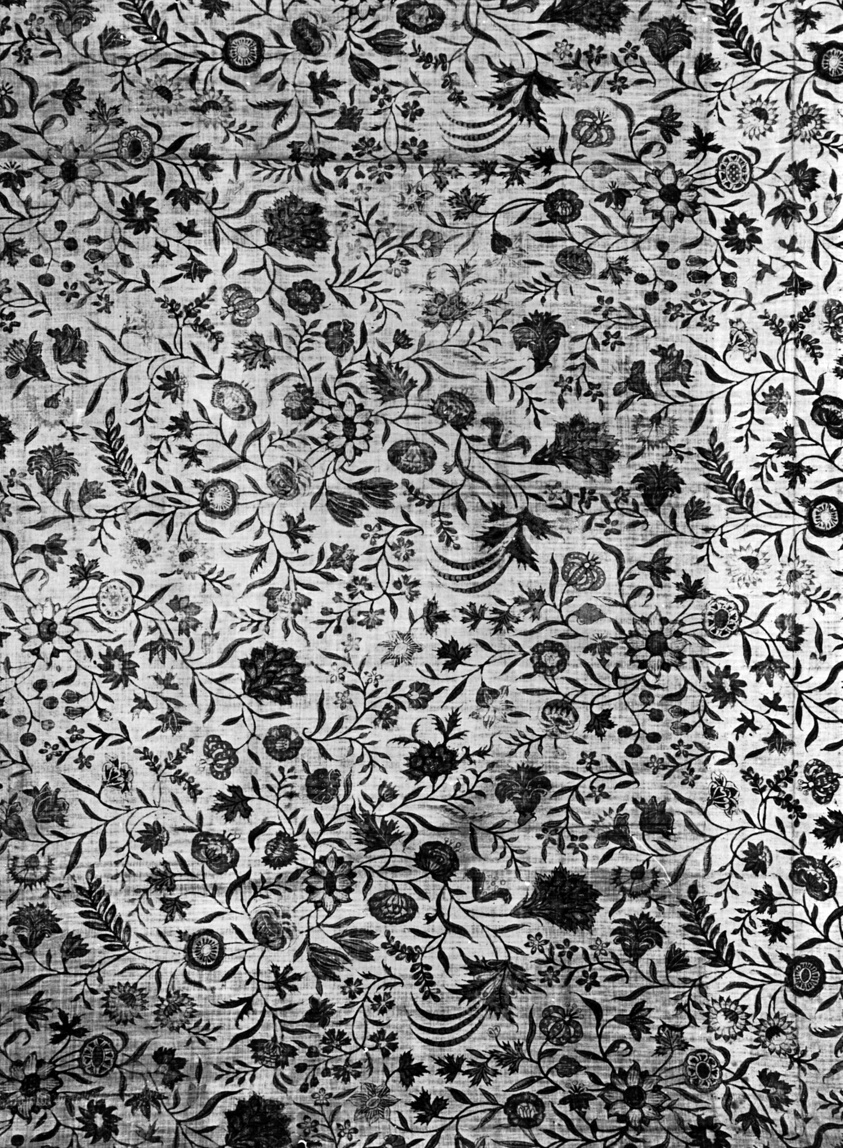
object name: Textile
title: Panel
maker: Netherlands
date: 18th century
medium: Cotton, plain weave; printed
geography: Netherlands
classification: textile; weaving - printed